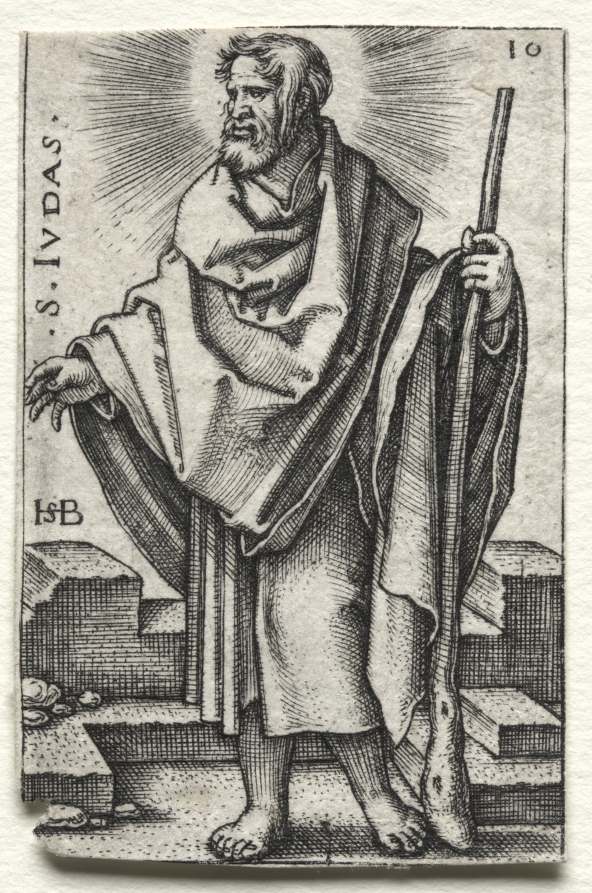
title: St. Judas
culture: Germany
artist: Hans Sebald Beham (German, 1500–1550)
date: 1545–1546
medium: engraving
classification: Print